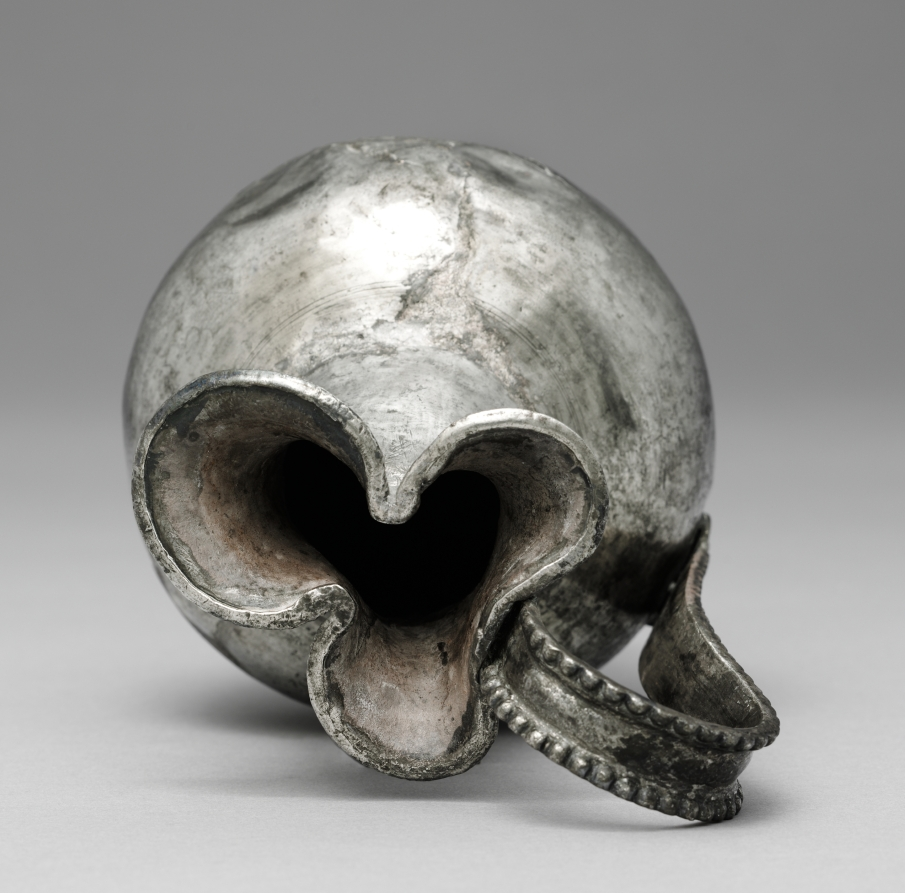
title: Ewer with a Trefoil (Three-Part) Spout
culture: Byzantium, Syria(?), Byzantine period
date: 300–600 CE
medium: silver with niello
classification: Metalwork